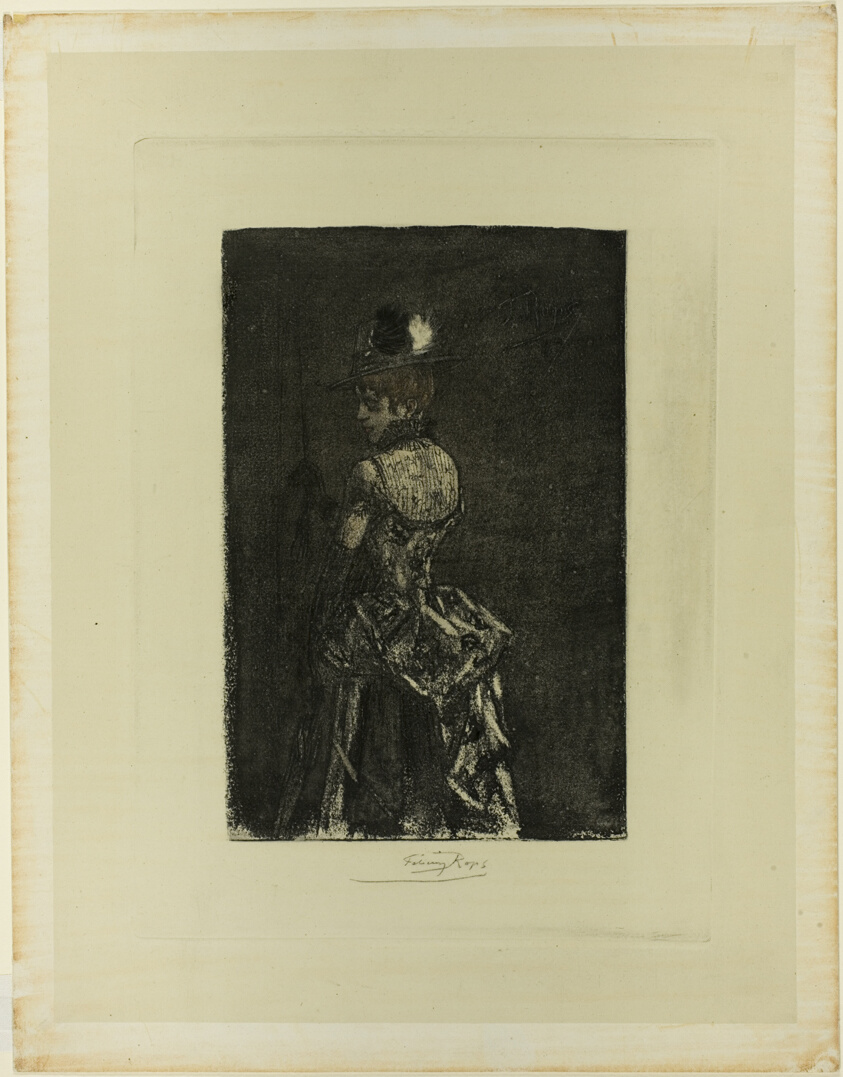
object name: Print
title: First Step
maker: Félicien Rops (Belgian, 1833-1898)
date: 1883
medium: Heliogravure, with drypoint, white heightening and hand-coloring, on ivory wove paper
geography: Belgium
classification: photogravure; print; prints and drawing